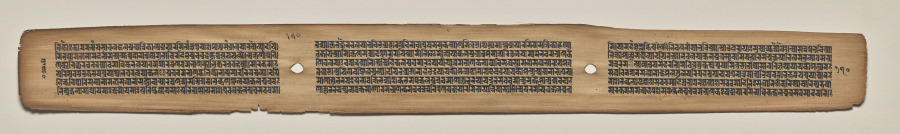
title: Text, folio 170 (verso), from a Manuscript of the Perfection of Wisdom in Eight Thousand Lines (Ashtasahasrika Prajnaparamita-sutra)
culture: Eastern India, Bihar, Vikramashila Monastery. Painting: Nepal, Kathmandu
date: Sunday, September 14, 1119 (year 239 of the Newar Samvat in the month of Ashvina)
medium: gum tempera and ink on palm leaves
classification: Painting